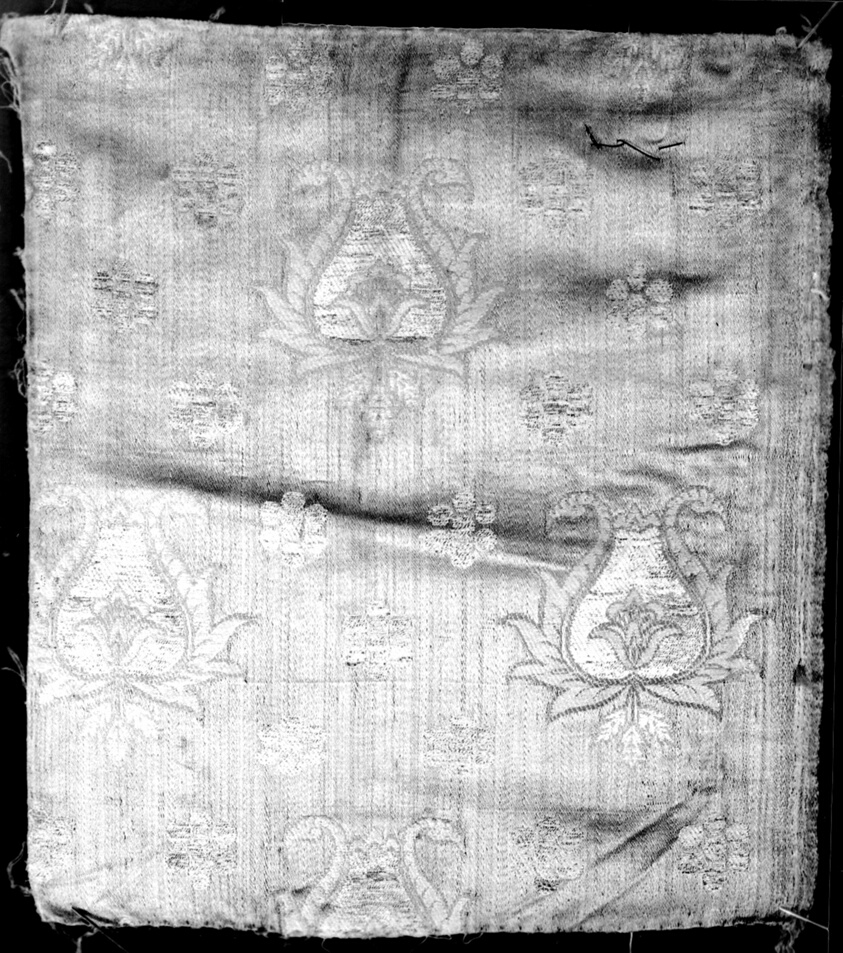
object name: Textile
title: Fragment (Dress Fabric)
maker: Iran (Persia)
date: 18th century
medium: Brocaded plain simple satin, silk, gold wound on yellow silk core, silver wound on white silk core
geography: Iran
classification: textile; weaving